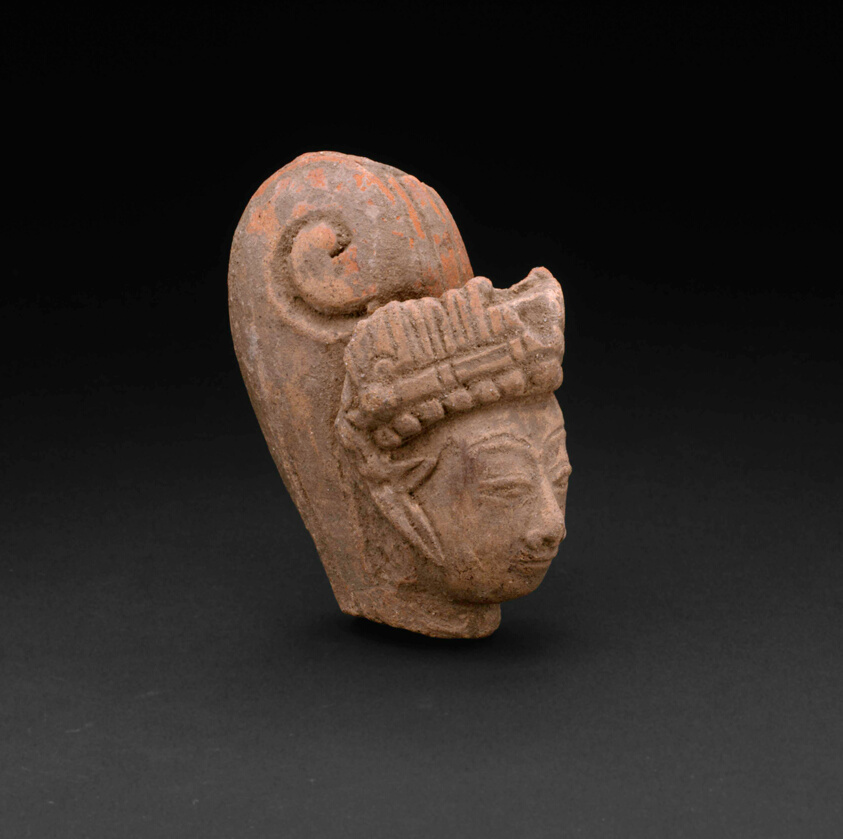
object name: Sculpture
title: Head from a Figurine of a Female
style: Southeast Asian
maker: Indonesia; Eastern Java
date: 14th/15th century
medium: Terracotta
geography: Eastern Java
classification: earthenware; ceramics; sculpture; asian art